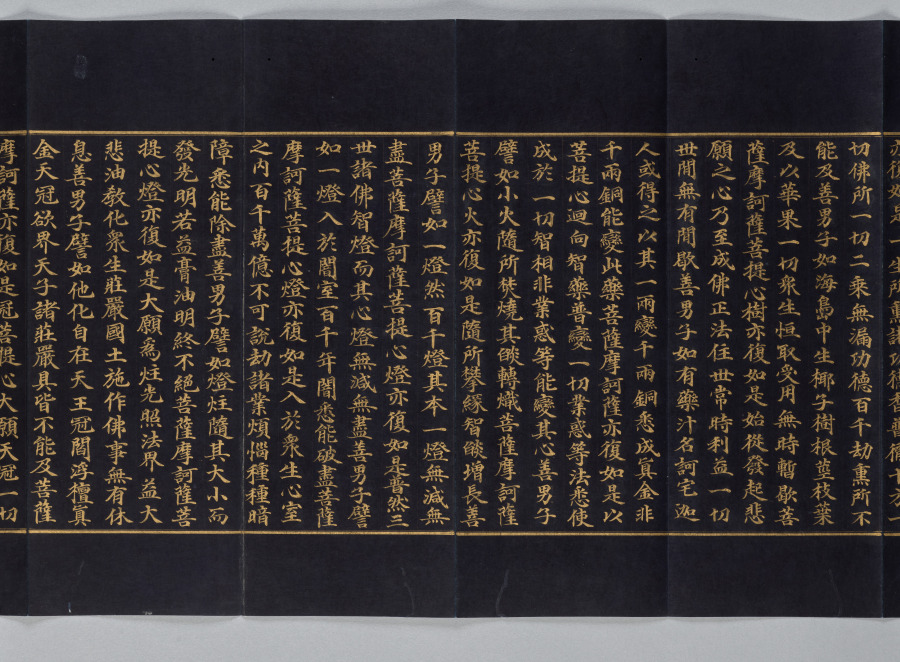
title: Avatamsaka Sutra No. 78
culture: Korea, Goryeo dynasty (918–1392)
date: 1300s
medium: Folded book with illustrated frontispiece; gold and silver on mulberry paper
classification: Bound Volume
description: This illuminated manuscript presents one part of the multivolume sacred text titled Avatamsaka (Flower Garland) sutra. Both the script and the image are rendered in gold ink on the smooth surface of the dark blue, indigo-dyed mulberry paper. This portion of the text, which reads from right to left, describes the encounter of the Buddha of the Future (Maitreya) and the young pilgrim Sudhana. The Buddha gives his words of wisdom to Sudhana, who asks questions about the path toward spiritual awakening. Mixed with ink and glue, the gold has a brilliance that strikingly reflects Sudhana’s ardent quest for understanding the way to reach enlightenment.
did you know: The pristine condition of this manuscript indicates that it was rarely used after its creation, revealing that the act of making a manuscript rather than reading it was the main religious goal.